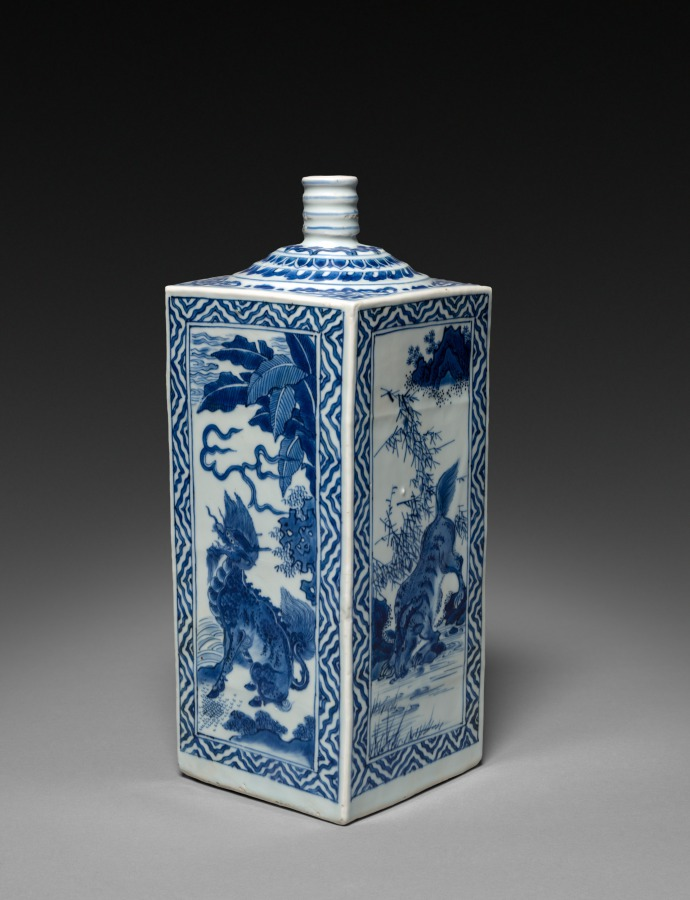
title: Transitional Blue-and-White Square Bottle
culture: China, Jiangxi province, Jingdezhen kilns, Ming dynasty (1368-1644), Chongzhen reign (1628-44) or Qing dynasty (1644-1911), Kangxi reign (1662-1722)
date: 1628–1722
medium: Porcelain with underglaze cobalt blue decoration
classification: Ceramic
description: The shape of this flask derives from European gin bottles. Its decoration in brilliant shades of blue with fantastic animal motifs—such as a leopard, the mystical qilin, a horse, and another imaginary beast—is characteristic of porcelain of the transitional period between the Ming and Qing dynasties when potters lost imperial patronage and experimented to find new clients in China and abroad.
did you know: This flask's square shape and design represents a departure from the earlier imperial Ming dynasty style, which is mostly ornamental and symmetrical.